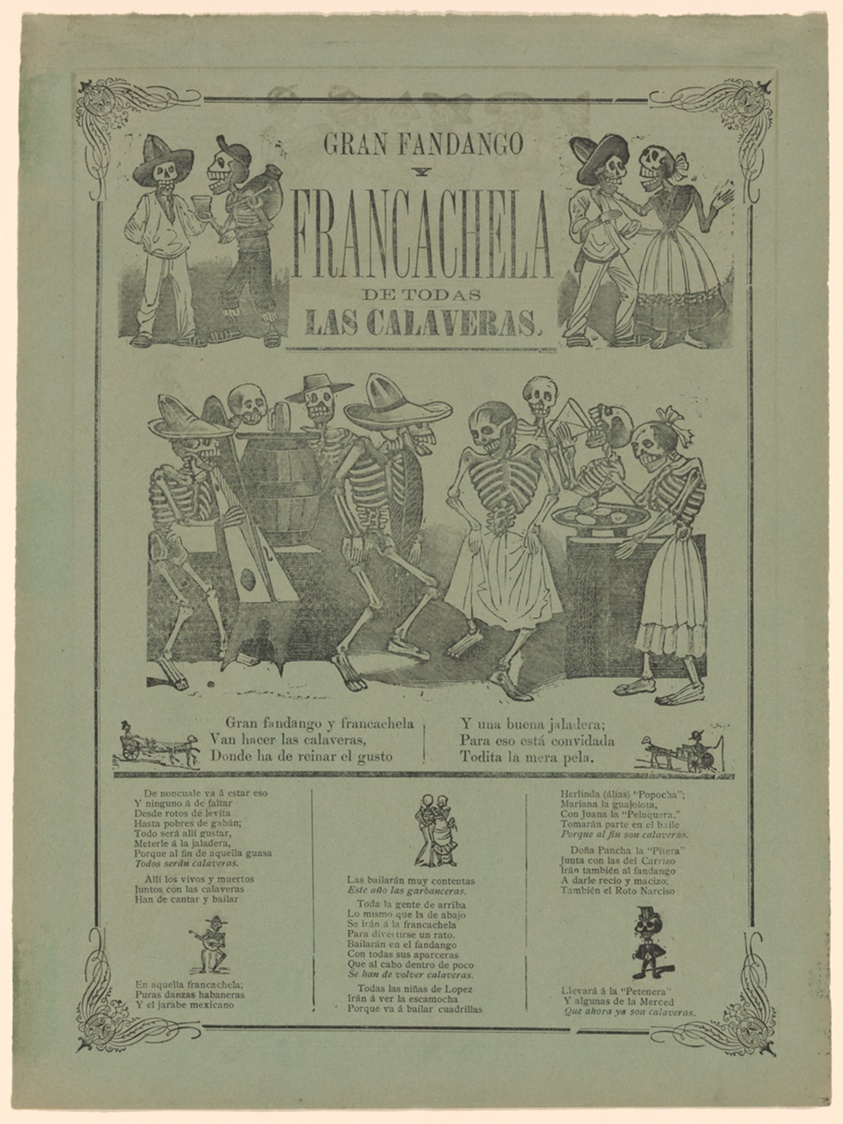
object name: Print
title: Grand Dance and Wild Party of All the Calaveras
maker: José Guadalupe Posada (Mexican, 1852-1913)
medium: Relief engraving or photo relief etching on green wove paper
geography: Mexico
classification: woodcut; print; prints and drawing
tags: text